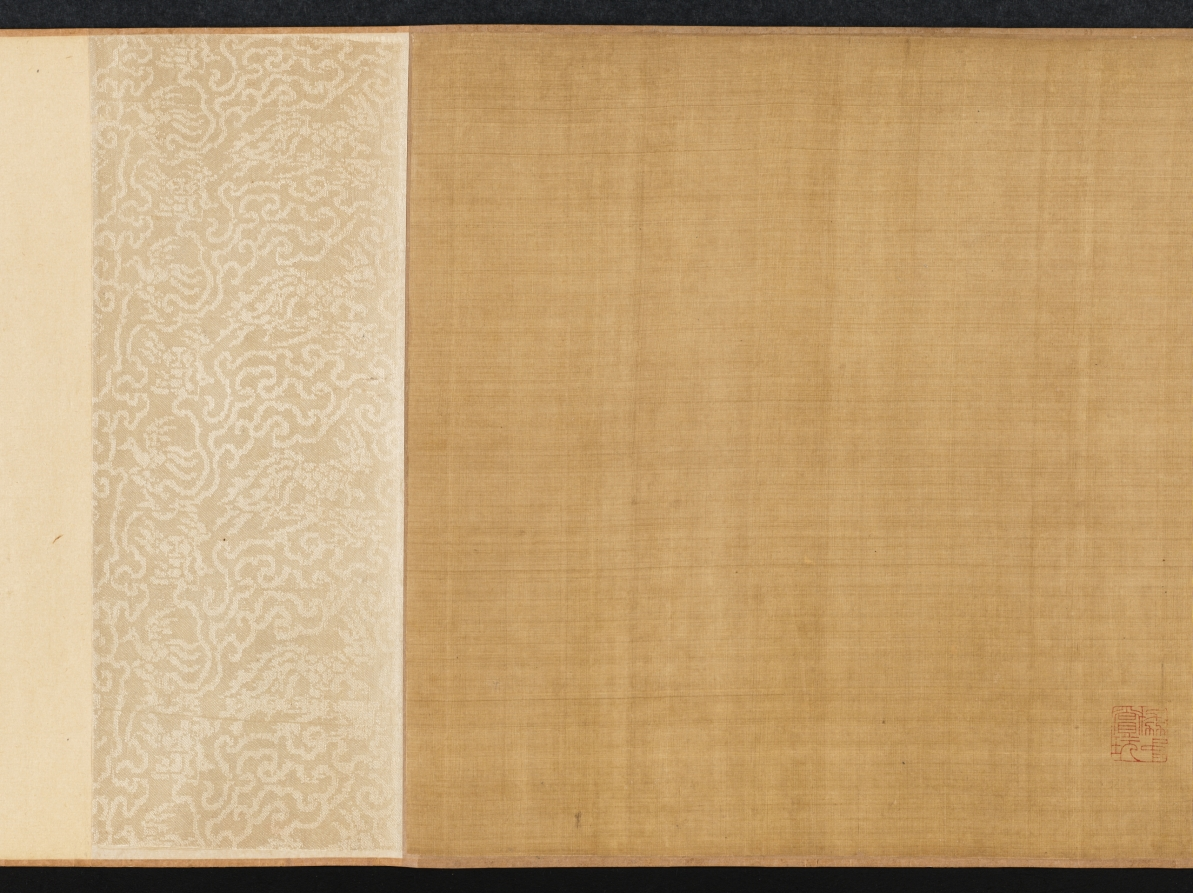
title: Three Horses and Four Grooms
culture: China, Yuan dynasty (1271-1368)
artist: Ren Renfa (Chinese, 1254–1328)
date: c. 1320s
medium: handscroll, ink and color on silk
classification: Painting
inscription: 月山道人. [印] 任氏子明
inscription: 1 colophon and 16 additional seals: 1 poem, 1 colophon dated 1552 or 1612, and 3 seals of Wang Yiying 王一瀛 (1500s); 2 seals of Liang Qingbiao 梁清標 (1620-1691); 6 seals of the Qianlong 乾隆 Emperor (r. 1736-95); 3 seals of the Jiaqing 嘉慶 Emperor (r. 1796-1821); 1 seal of the Xuantong 宣統 Emperor (r. 1908-12); 1 seal of Yu Xiezhong 余協中 (1900s).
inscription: Poem and colophon by Wang Yiying 王一瀛 (1500s): As for painters of horses in the previous dynasty, Surely the name of Yueshan [Ren Renfa] must come first. Under his brush and on his silk, They seem to have just galloped out from the imperial stud. Now as the world overflows with inferiority, Who, from the stable, can recognize a dragon-horse amidst mediocrity. Ren Yueshan [Ren Renfa] of the Yuan Dynasty was best in horse paintings. The three fine steeds he painted in this scroll are so dashing, so vigorous in spirit that they have indeed grasped some of the "brush-idea" of Han Gan. Not long ago this painting came into the possession of Mr. Gui Shanquan, who asked for my inscription. And I, while reading the old manuscripts of Hengshan [Wen Zhengming, 1470-1559], by accident, came cross the poem quoted above. As the ancients said "in painting horses, Master Han was [inspired by and produced] real horses; in composing poems, Master Su [Su Dongpo, the leading Song poet] wrote as if a painting were before him." These are truly what should be considered the two excellences; indeed, they are to be treasured. In the sixth month of the renzi year [either 1552 or 1612]. Jian feng shan ren [The Mountain Dweller of the Sword Peak], Wang Yiying, written in the Qu si ting Pavilion at Chiyang.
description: Ren Renfa's horse images are elegant in appearance and vigorous in spirit. His work attracted not only Chinese scholars but also the Mongols at the imperial court. Inspired by the contemporary scholarly interest in restoring a sense of antiquity in art—an artistic direction led by Zhao Mengfu that exerted a great impact in the Yuan art scene—Ren Renfa, like Zhao Mengfu, modeled his depictions of horses after the Song master Li Gonglin. Another key style component that Ren introduced to this genre was a revival of the Tang classical tradition. The refined color treatment of the horses as seen here was derived from the Tang master Han Gan.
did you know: Only the elegant first horse with a white blaze is accompanied by two grooms, as if its lightning speed required extra supervision.